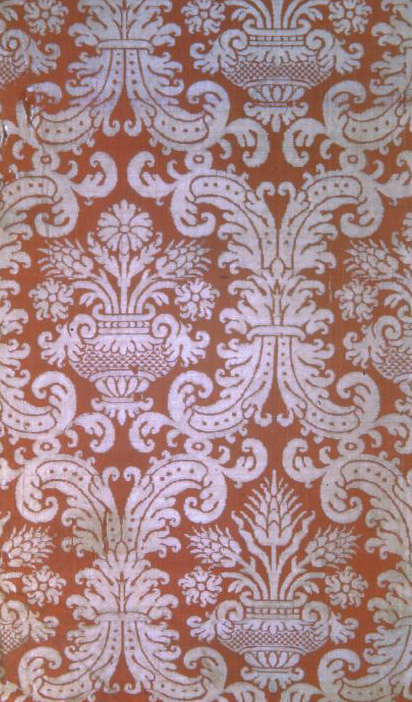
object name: Textile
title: Fragment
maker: Italy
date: 16th century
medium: silk, fancy simple satin weave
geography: Italy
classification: textile; weaving